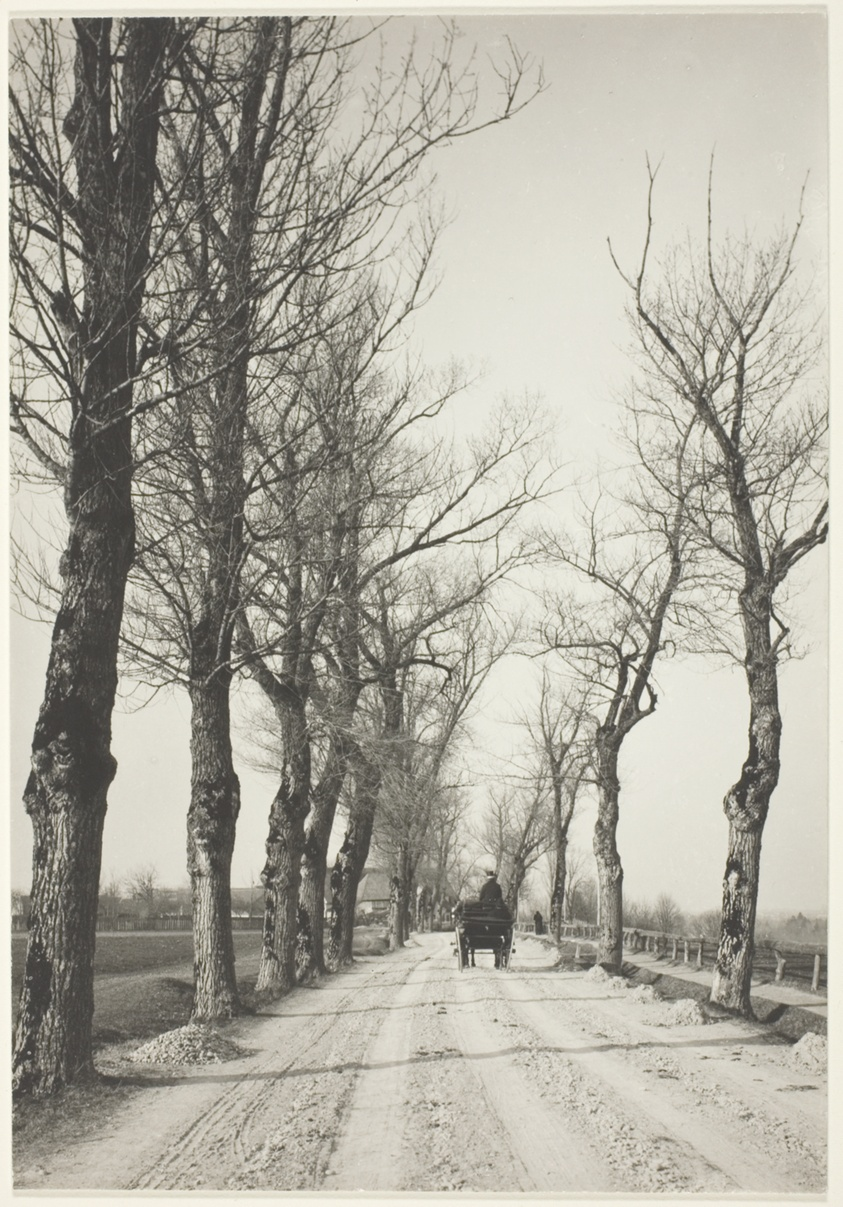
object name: Photograph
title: November Days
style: Pictorialism, 19th century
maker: Alfred Stieglitz (American, 1864–1946)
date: 1887, printed 1920/39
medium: Gelatin silver print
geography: United States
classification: gelatin silver (developing-out-paper) pr; photographic process; photography; photograph